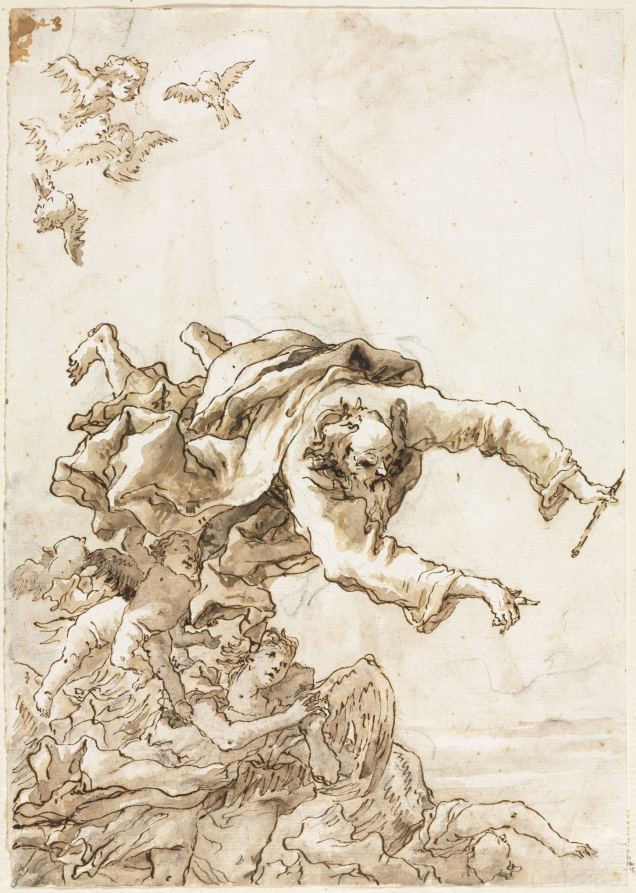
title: God the Father with Angels and Cherubs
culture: Italy, 18th century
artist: Giovanni Domenico Tiepolo (Italian, 1727–1804)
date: 1758 or after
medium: pen and brown ink and brush and brown wash over black chalk; traces of framing lines in silver paint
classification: Drawing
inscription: upper left, in brown ink: 23 ; RECTO OF SECONDARY SUPPORT, lower right, in graphite: 27 1/2 19 1/2 [partially erased] ; VERSO OF SECONDARY SUPPORT, upper right, in graphite: A - [69?] [underlined] / [good?] [underlined] ; lower left and lower center, in graphite: C. 182 DM Tiepolo / Asta 1928 / Venice